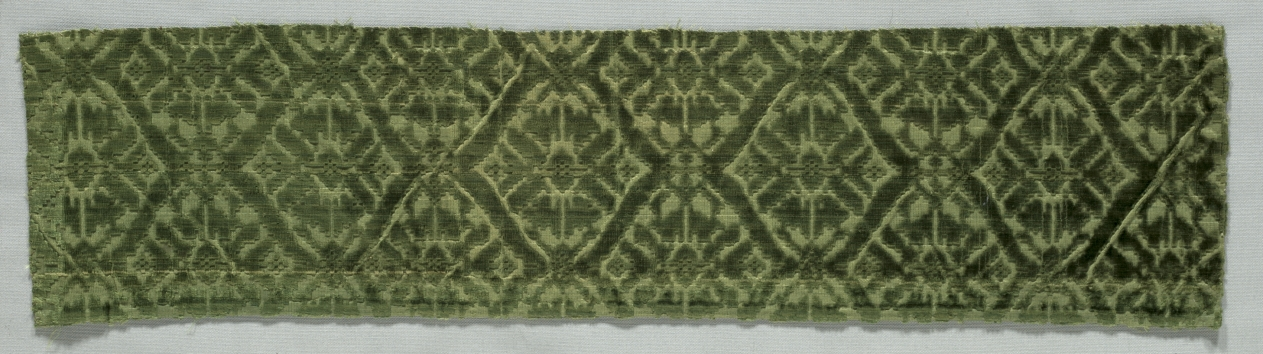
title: Velvet Fragment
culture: Italy, early 18th Century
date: 1700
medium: velvet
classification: Velvet